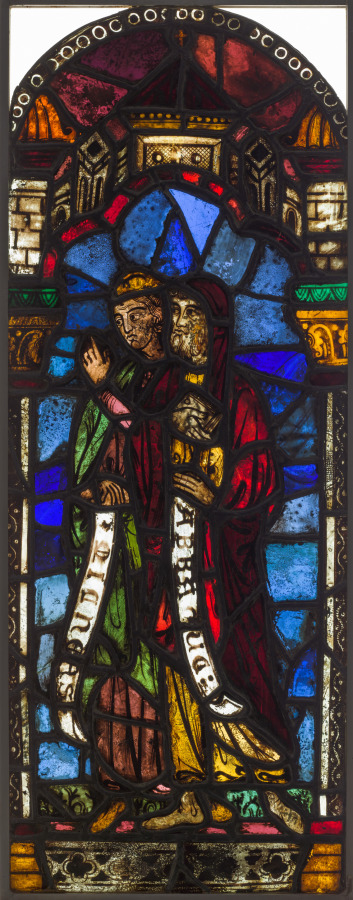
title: Panel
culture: France, early 13th century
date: c. 1200–1225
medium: pot-metal and white glass, silver stain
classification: Glass